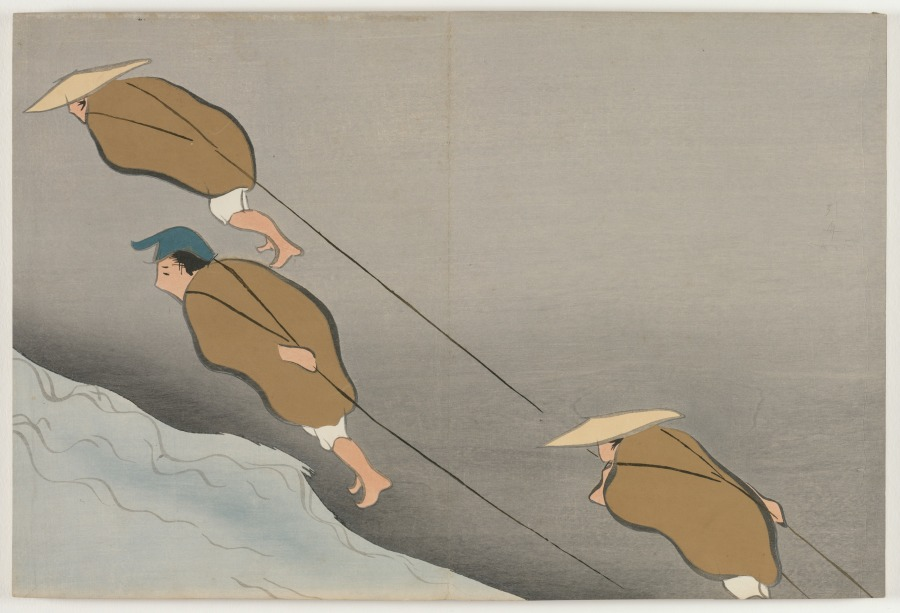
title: Flowers of a Hundred Worlds (Momoyogusa): Tugging Boats (Hikibune)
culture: Japan, Meiji period (1868–1912)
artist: Kamisaka Sekka (Japanese, 1866–1942)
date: 1909–10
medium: color woodcuts with gold and silver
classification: Bound Volume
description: This print from a set of three woodblock printed albums displays the graphic design prowess of Kamisaka Sekka. The images were first distributed one by one to subscribers to the series but later were reissued in bound form, like this book, for mass consumers. Each print features a vignette taken from nature or Japanese literature. Many of the scenes have a long history in Japan, originating in the 900s or 1000s and having been interpreted by all manner of artists since that time. Sekka’s selections hew closely to precedents from the Rinpa style originated by painter Tawaraya Sōtatsu (c. 1570–c. 1640) and calligrapher Hon’ami Kōetsu (1558–1637).